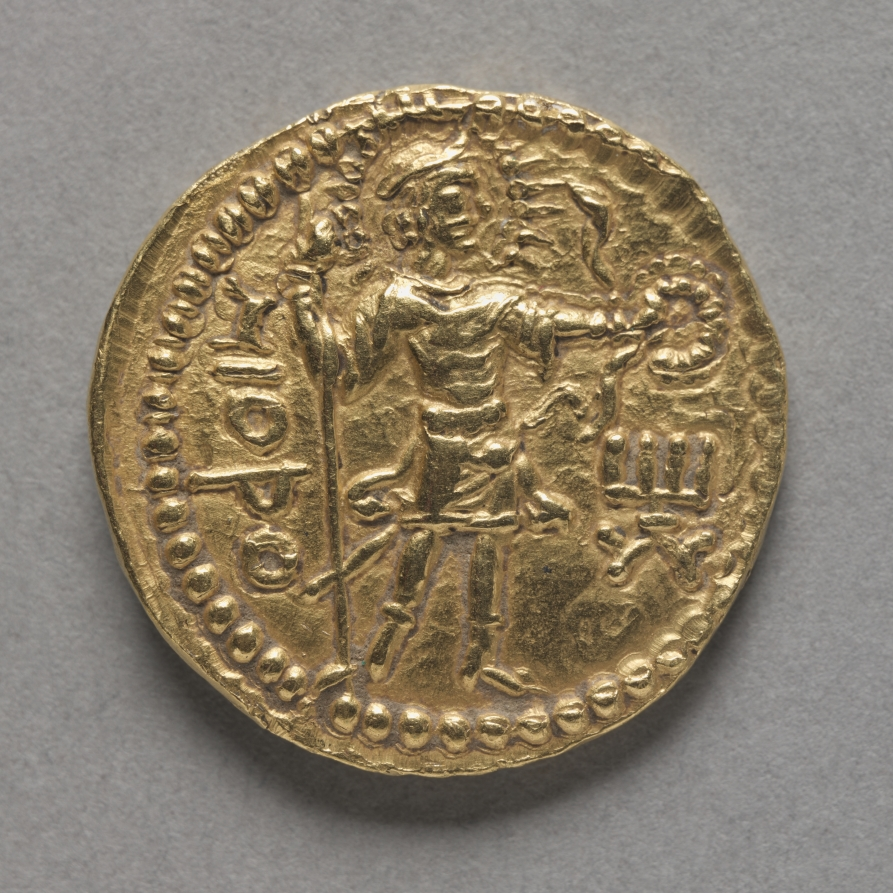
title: Coin: Havishka (reverse)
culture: India, Mathura, Kushan period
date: c. 106–149 CE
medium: gold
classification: Coins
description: This gold coin represents the reign of the Kushana ruler, Havishka. The coin bears a portrait of the ruler on the obverse and various deities on the reverse. It is identified by inscriptions in Kharosthi, the language used in northwestern India during the Kushan period.